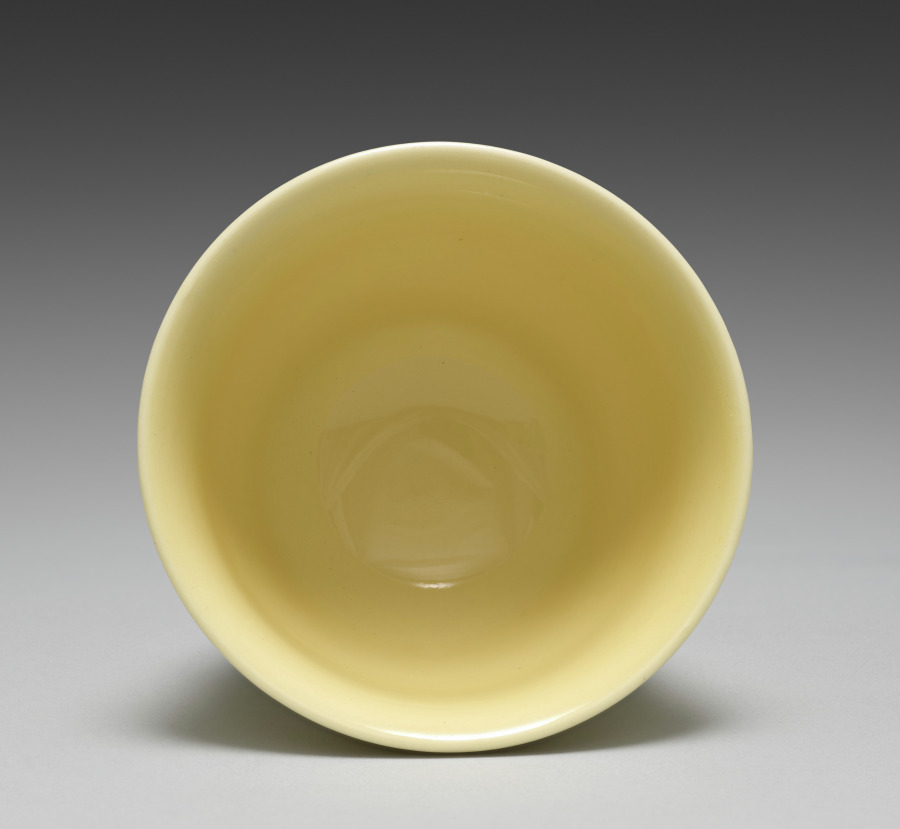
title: Cup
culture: Japan, Taishō period (1912–26) or Shōwa period (1926–89)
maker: Seifū Yohei IV (Japanese, 1872–1951)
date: 1914–46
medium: porcelain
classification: Ceramic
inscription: 清風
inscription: 清風造 【印】成山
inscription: 清風盧人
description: Like his father, Yohei IV also produced works with red or yellow monochrome glazes. His yellow-glazed works include this set of five drinking cups, a pair of sake pourers CMA 2022.216, and a sweets bowl molded into the shape of a chrysanthemum CMA 2022.218.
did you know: Seifū Yohei IV learned the ceramics industry from his father and painting from Tanomura Shosai.